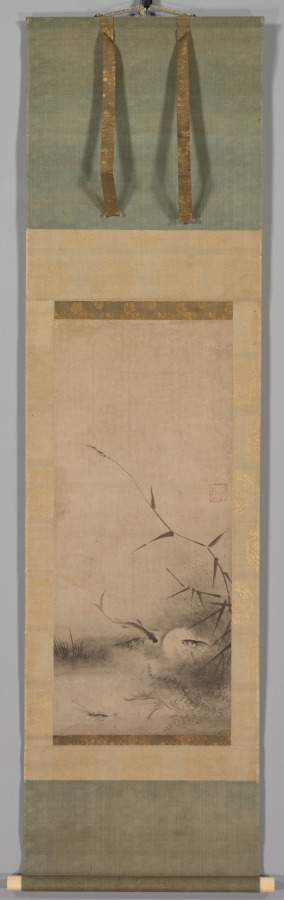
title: Fish and Seaweed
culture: Japan, Momoyama period (1573–1615)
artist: Rinkyo (Japanese)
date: 1573–1615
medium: one of a pair of hanging scrolls; ink on paper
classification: Painting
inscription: artist's seal at mid-right edge of painting.